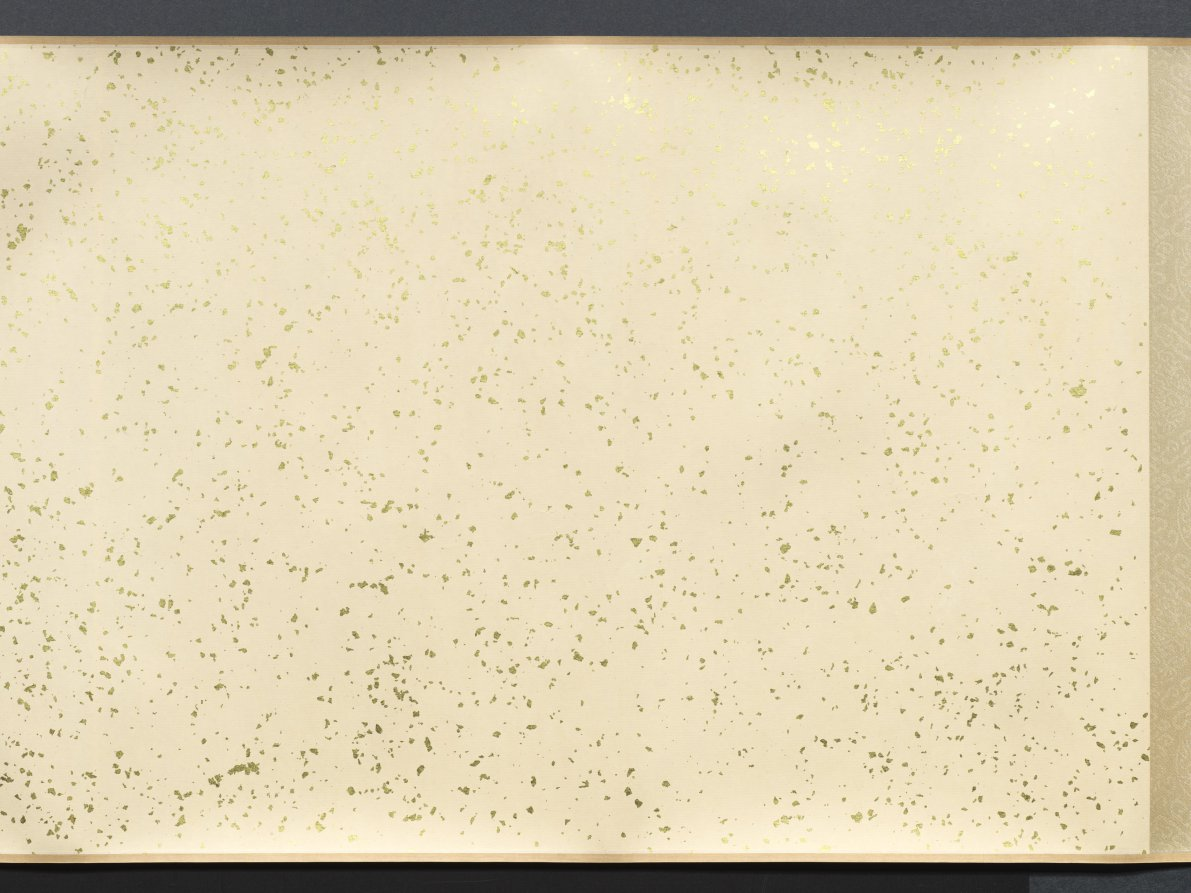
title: Calligraphy in Running Style based on Wang Bo's Essay on Tengwang Pavilion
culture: China, Changbai, Qing dynasty (1644-1911)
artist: Tiebao (Chinese, 1752–1824)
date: 1811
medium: handscroll, ink on paper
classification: Calligraphy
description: A member of the Donggo clan, Tiebao belonged to the Manchu Plain Yellow Banner army. As an official in the Qing court, he endured considerable vicissitude and his career was never smooth. Celebrated as a man of letters, he oversaw the publications of the Manchu military system as well as an anthology of poems by members of the imperial family and other Manchu dignitaries. In calligraphy, he was regarded as the equal of such eighteenth-century luminaries as Liu Yong (1720-1805) and Weng Fanggang (1733-1818). This handscroll is a work of his mature years and is exemplary of his disciplined and highly subtle approach to the art of calligraphy.